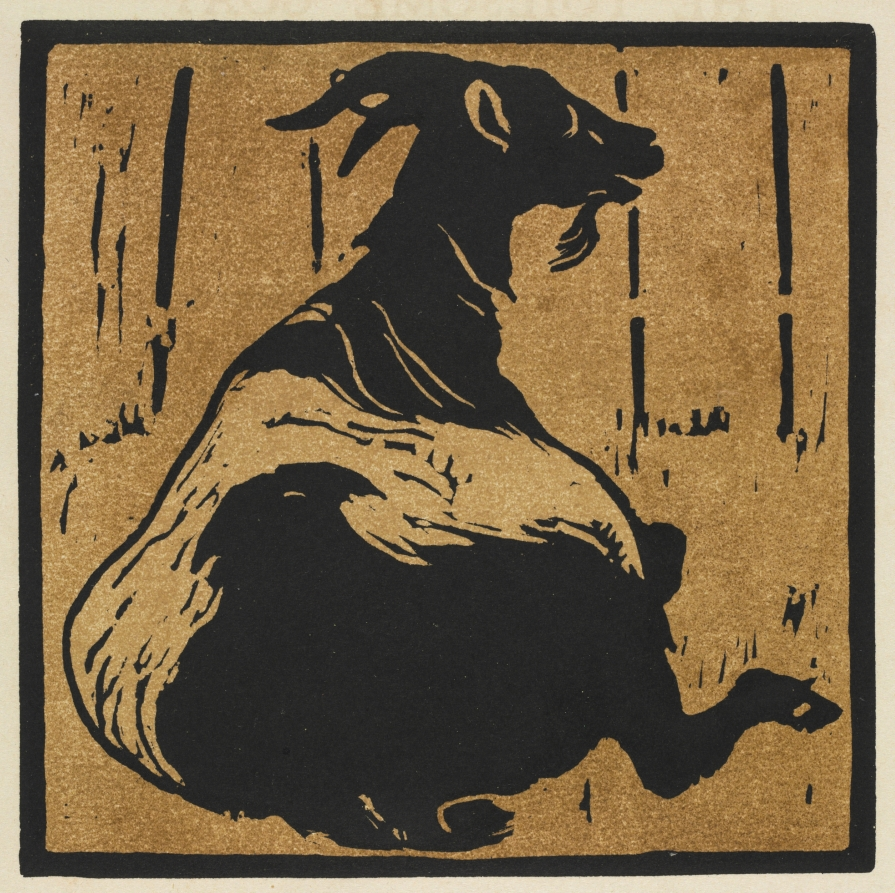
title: The Square Book of Animals: The Toilsome Goat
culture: England, 19th century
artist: William Nicholson (British, 1872–1949)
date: 1899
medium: color lithograph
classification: Print